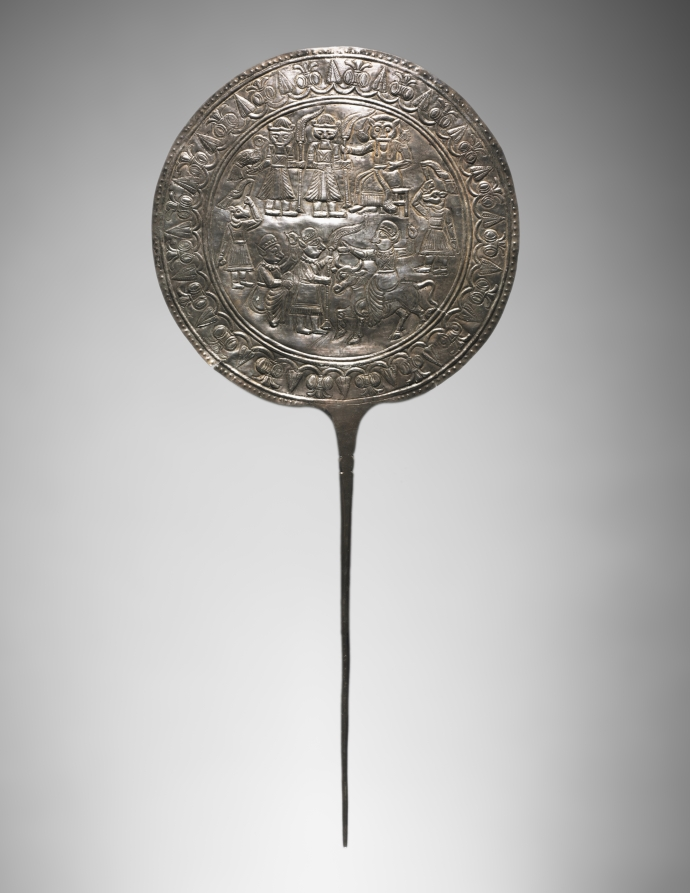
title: Votive Pin with Decorated Disc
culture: Iran, Luristan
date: 800–600 BCE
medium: silver, repoussé and incised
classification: Metalwork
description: A complex mythological scene unfolds on the decorative disc of this silver pin. On the top register, two bearded figures carrying palm fronds and a bird extend a frond to a seated lion-headed man. Below, two figures holding fronds approach a man riding a bull. Two animal-headed beings flank the registers and perhaps hold banners in their hands. A pattern of stylized lotus buds and blossoms decorates the disk’s rim. The scene may represent a Mesopotamian or Iranian myth. The pin was made with the repoussé technique by hammering designs into the back.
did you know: Luristan votive pins were sometimes found pushed into the walls of religious sanctuaries.